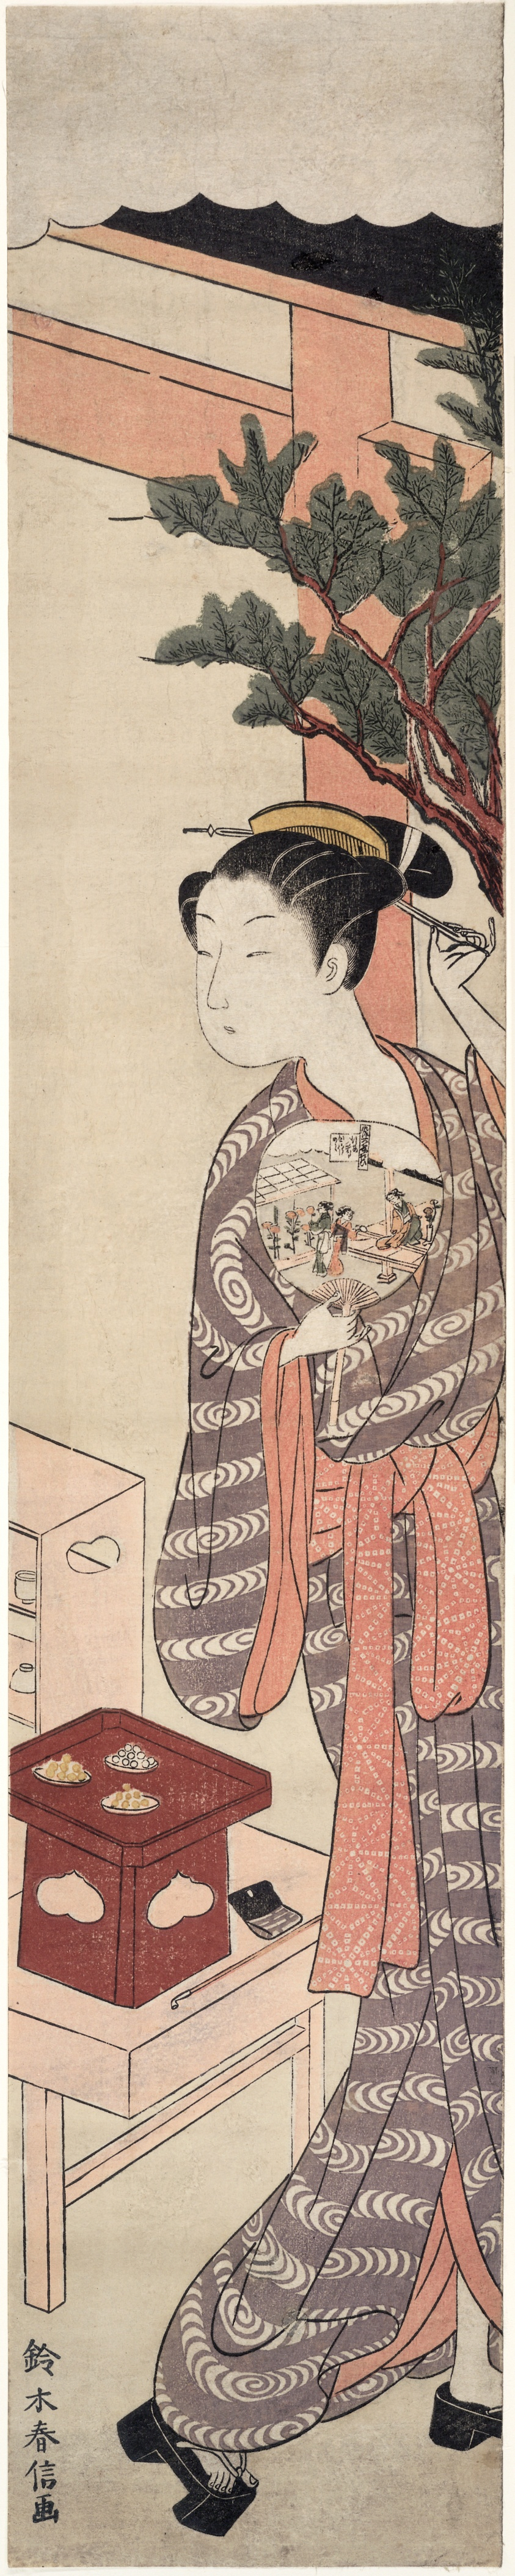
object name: Print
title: The Tea Stall - Kagiya Osen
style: Japanese (culture or style)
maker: Suzuki Harunobu 鈴木 春信; Japanese, 1725 (?)-1770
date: c. 1769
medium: Color woodblock print; hashira-e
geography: Japan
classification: woodblock print; print; asian art